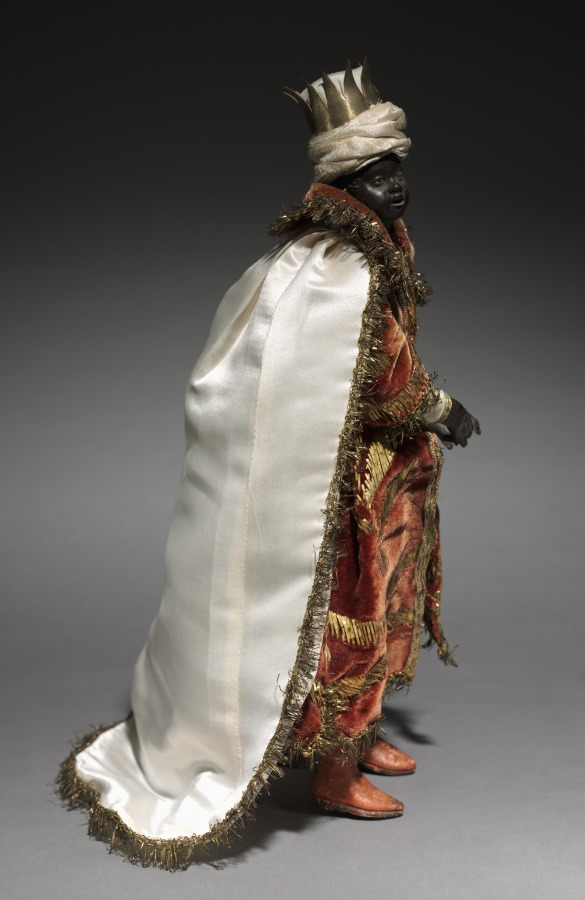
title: Figure from a Crèche: Negro Magus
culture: Italy, Naples, late 18th-early 19th century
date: 1780–1830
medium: painted wood and terracotta with various textiles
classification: Sculpture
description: The practice of creating scenes of the Nativity for the home dates from the early 1700s in Italy, where people began to set up doll-like figures of about a foot or less in height. The custom was particularly popular in Naples around 1800, where crèche scenes (crèche means cradle, or crib) included many figures, whose heads and hands of painted terracotta, stuffed cloth bodies, and clothing adapted from contemporary local costumes gave them an amazingly realistic character. Representations of the birth of Jesus can be traced to the first few centuries of Christianity. Both living creatures and sculptural depictions of them were used from early times. By the late middle ages it was customary to create life-size figures of wood or stone, naturalistically painted, to represent the characters who participated in the events of Jesus's early life. These sculptures were then arranged in scenes illustrating one or both of the most important of these events, the Adoration of the Shepherds and the Adoration of the Magi-the three kings from the East who came to pay homage to the Christ child. Used in churches, these large figures were especially popular in Italy, Central Europe, Spain, and Portugal.